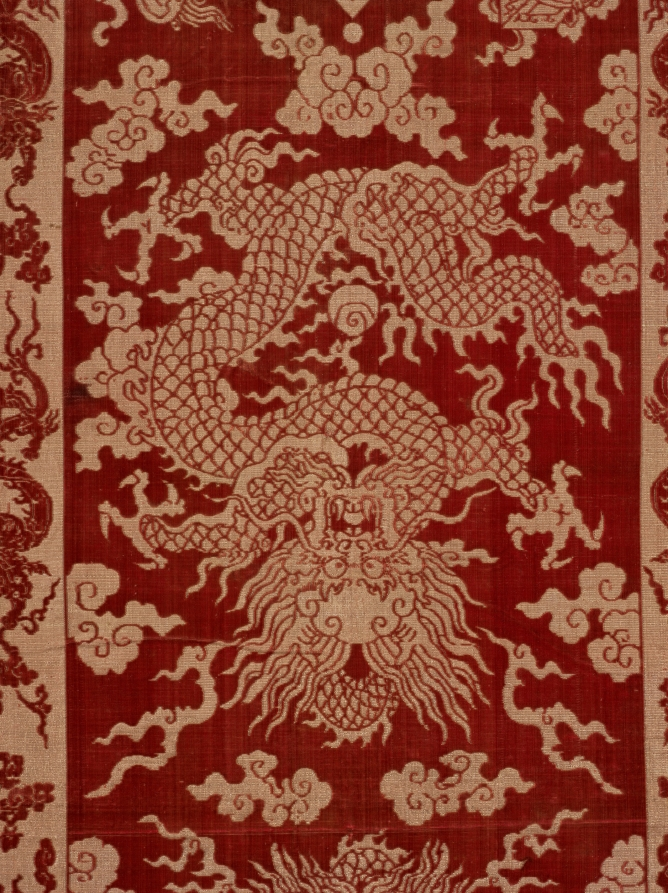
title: Velvet Strip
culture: China, Qing dynasty (1644-1911)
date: mid-1800s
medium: Velvet and gold thread; brocade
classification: Velvet